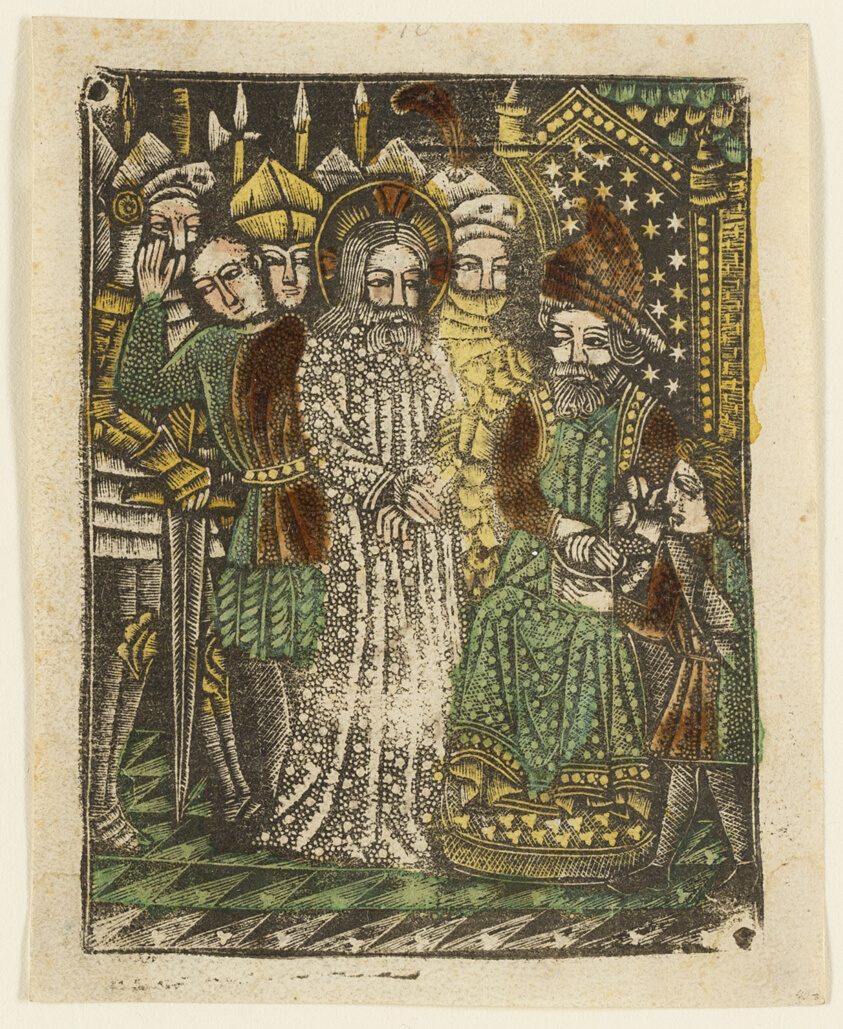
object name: Print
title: Christ before Pilate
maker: Artist unknown; Bavarian, 15th century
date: 1460–65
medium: Metalcut in black hand colored with brush and watercolor in yellow, red-brown lake, and green, on ivory laid paper, with manuscript text in pen and brown ink on verso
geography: Germany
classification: dotted/metal cut; book; prints and drawing; print